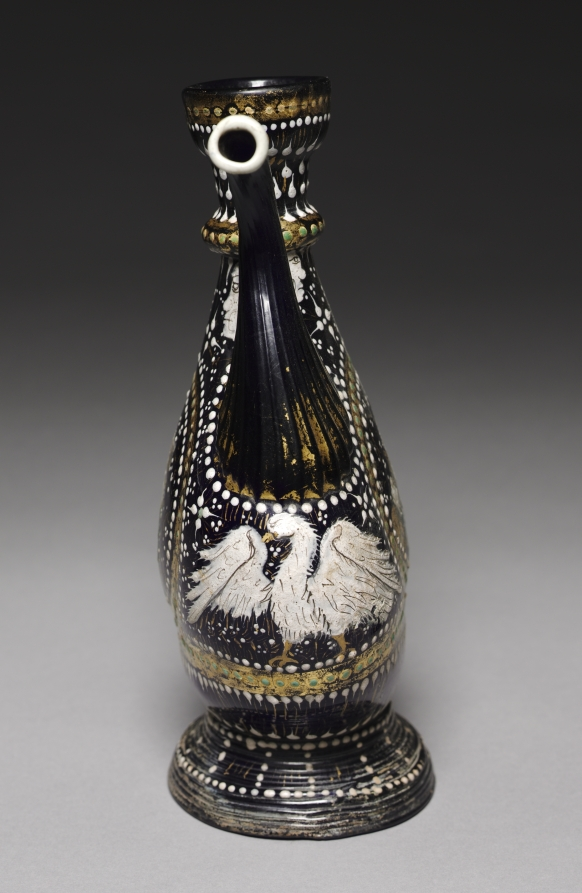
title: Ewer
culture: Italy, Venice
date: c. 1480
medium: enameled lapis-blue glass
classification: Glass